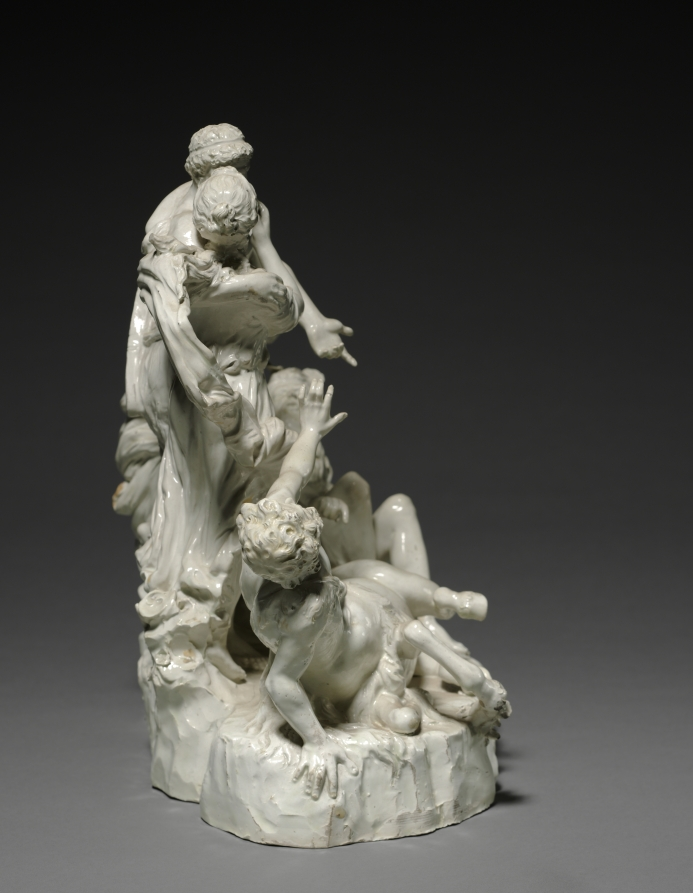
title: Hercules, Deianeira, and Nessus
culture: Italy, Naples, Capo di Monte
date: 1700s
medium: glazed ceramic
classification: Sculpture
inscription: Crowned "N" impressed in paste on the bottom.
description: Charles III, King of Naples, established the Capodimonte royal porcelain factory under his patronage in 1743. Responding to the success of Northern European porcelain factories, the Capodimonte group perfected their soft-paste porcelain and produced a variety of high-quality objects, ranging from Rococo-inspired decorative arts to more sculptural works. This unpainted figural group depicts the climax of an episode from the later life of Hercules. His heroic nature prevented Hercules from adapting to domestic life, much to the dismay of his wife, Dejanira. Growing tired of his absence, on one occasion Dejanira pursued Hercules. When she reached a river she could not cross, Dejanira accepted a ride from a centaur, Nessus, who, after taking her half way, attempted to abduct her. Here we see Dejanira clinging to her husband, who has arrived in time to slay Nessus with a poison-tipped arrow.